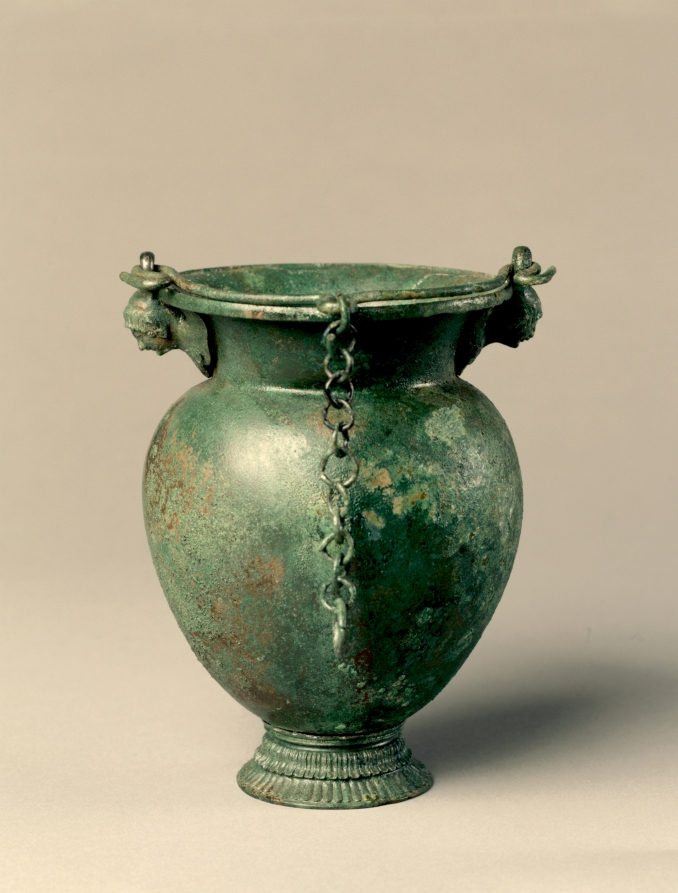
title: Situla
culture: Etruscan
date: c. 525–450 BCE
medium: bronze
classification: Metalwork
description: Known as a situla, or bucket, this bronze vessel features an ovoid body with a flaring neck. The separately made foot is quite elaborate and unusually shaped for this type of vessel. More typical is the handle, designed to swing upward from its two attachments, each finely cast in the form of a frontal siren with earrings and very small, simplified wings.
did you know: The handle includes a loop with attached chain, perhaps meant for hanging.